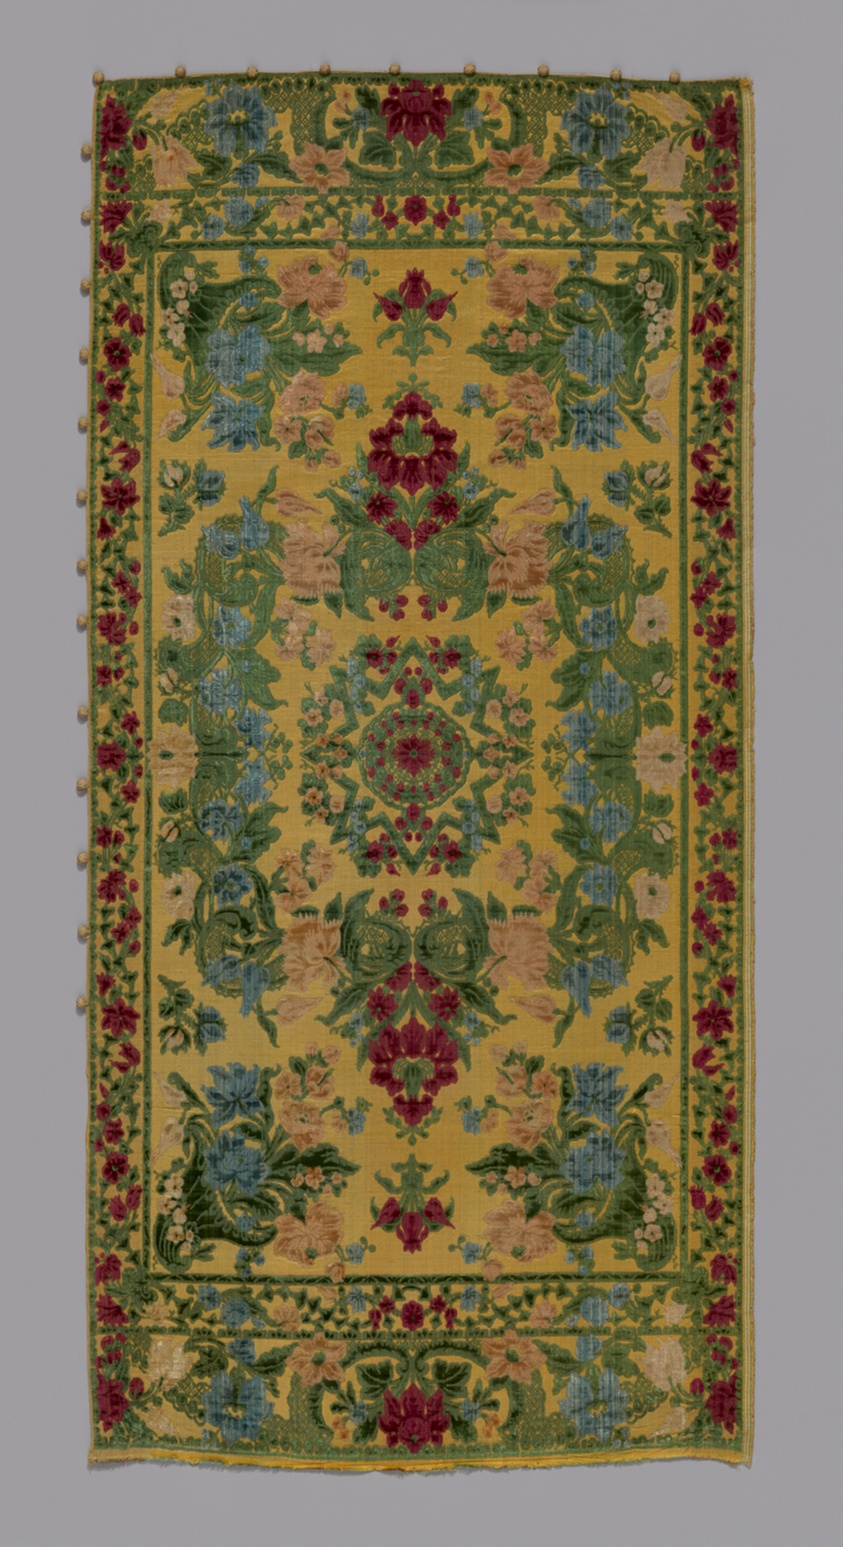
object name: Textile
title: Panel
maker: Italy, Genoa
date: 1701/50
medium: Silk, warp-float faced 3:1 broken warp chevron twill weave with gilt-metal-strip supplementary facing wefts and supplementary pile warps forming cut and uncut, voided velvet; edged with silk, oblique interlaced ball fringe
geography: Italy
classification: textile; weaving - velvet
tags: medallions, floral arrangements